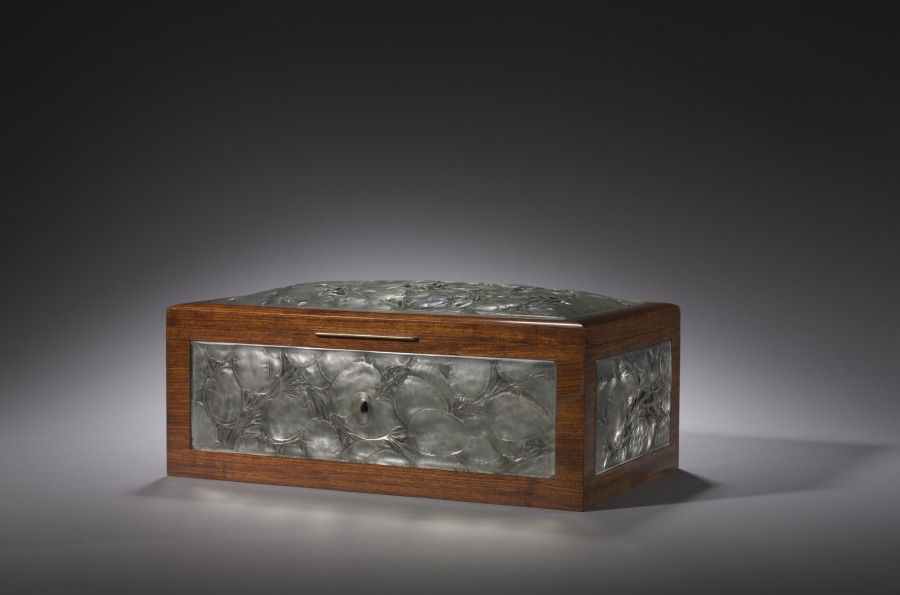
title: Monnaie du Pape Coffer (coffret)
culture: France, 20th century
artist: René Lalique (French, 1860–1945)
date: c. 1914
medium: wood, bombé glass panels with gray patina, metal key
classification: Mixed Media